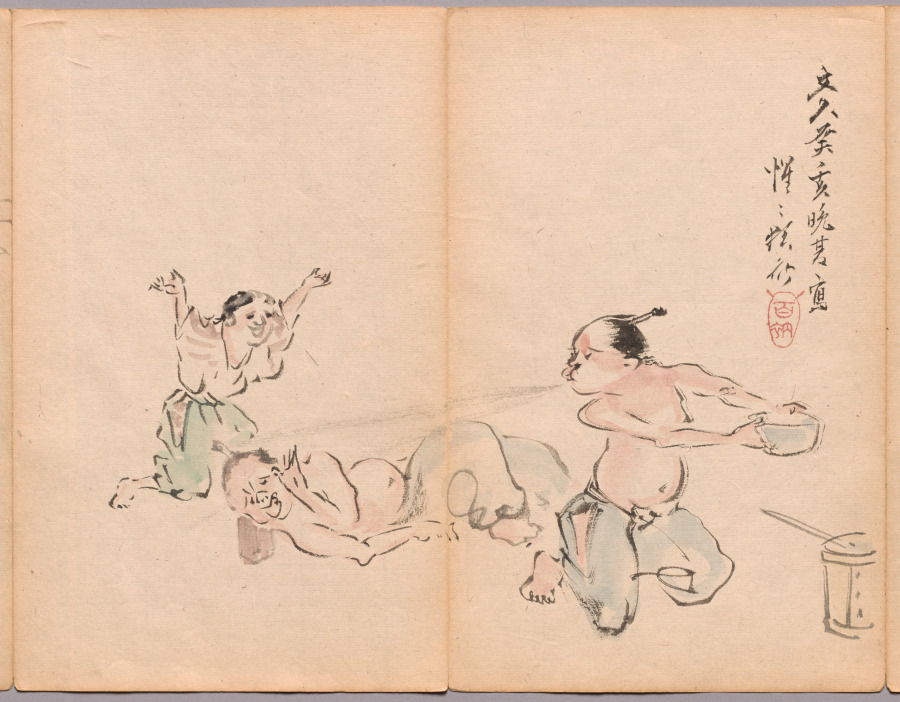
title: Cool Spray at Naptime from Sketch Album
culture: Japan, Edo period (1615–1868) to Meiji period (1868–1912)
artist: Kawanabe Kyōsai (Japanese, 1831–1889)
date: mid- to late 1800s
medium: Accordion-style book of 26 double-leaves; ink and color on paper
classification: Bound Volume